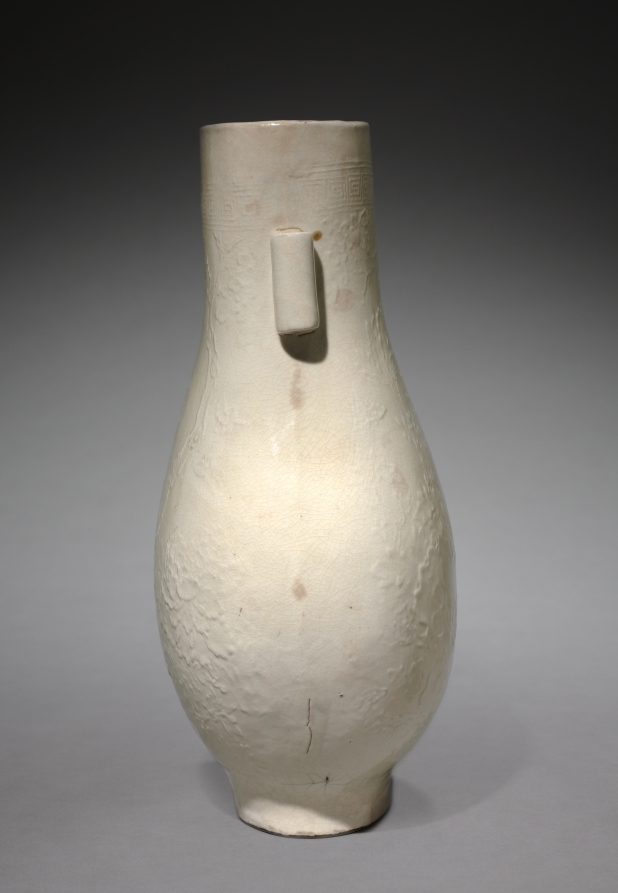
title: Vase: Ding ware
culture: China, Ming dynasty (1368–1644)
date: 1368–1644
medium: porcelain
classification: Ceramic